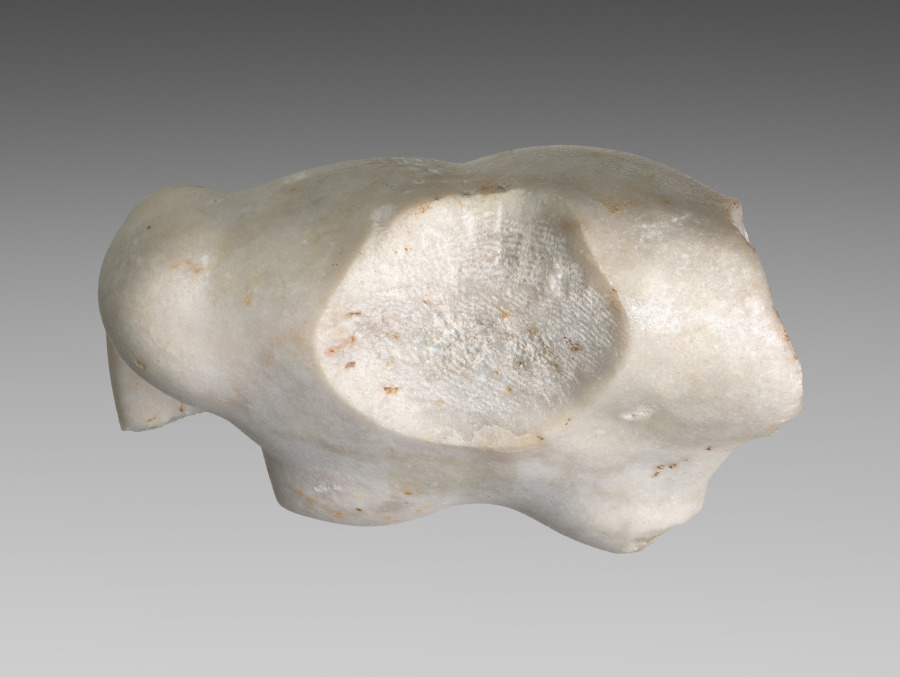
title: Torso of Venus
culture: Roman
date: 1–200 CE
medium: marble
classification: Sculpture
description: As avid collectors of Greek art, ancient Romans valued sculptures for their aesthetic qualities. This torso of Venus was likely inspired by the popularity of Praxiteles's nude Aphrodite from the Greek city-state of Knidos on the western coast of Asia Minor. Displayed in a circular shrine, it became one of the most celebrated sculptures in classical antiquity.